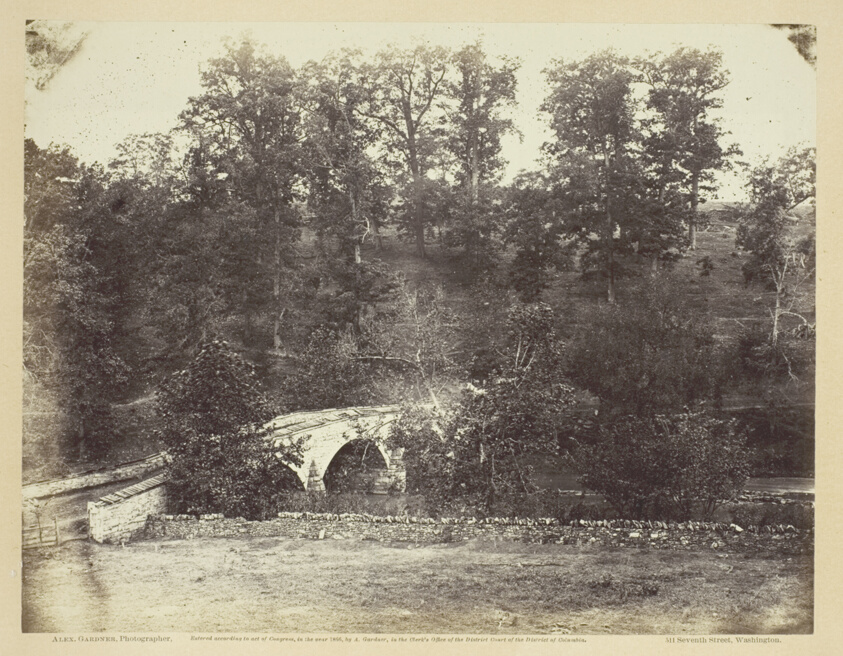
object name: Photograph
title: Burnside Bridge, Across Antietam Creek, Maryland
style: 19th century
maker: Alexander Gardner (American, born Scotland, 1821–1882)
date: September 1862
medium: Albumen print, pl. 20 from the album "Gardner's Photographic Sketch Book of the War, vol. 1" (1866)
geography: United States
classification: photograph; albumen silver print; photography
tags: Collected by Hugh Edwards, Gardner's Photographic Sketch Book